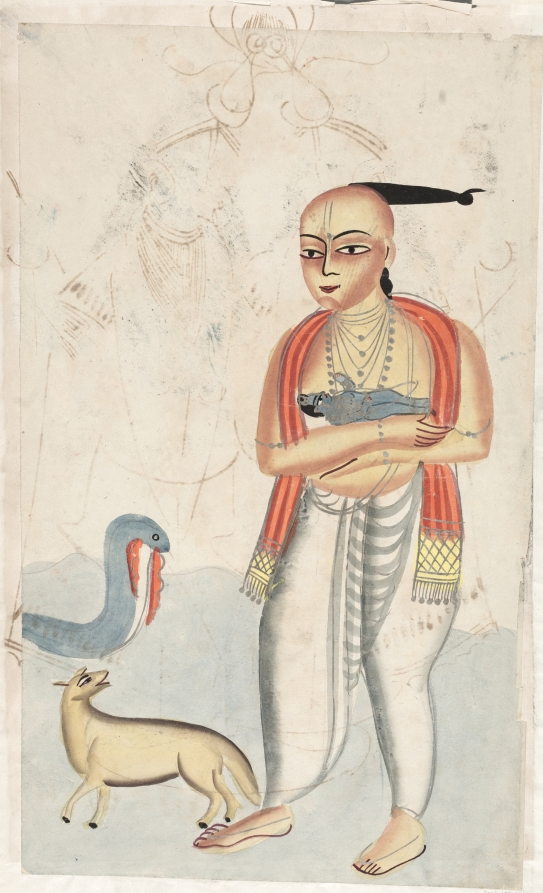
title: Hari-Hara (recto), from a Kalighat album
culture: Eastern India, Bengal, Kolkata, Kalighat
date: c. 1890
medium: Gum tempera, graphite, ink, and tin on paper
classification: Painting